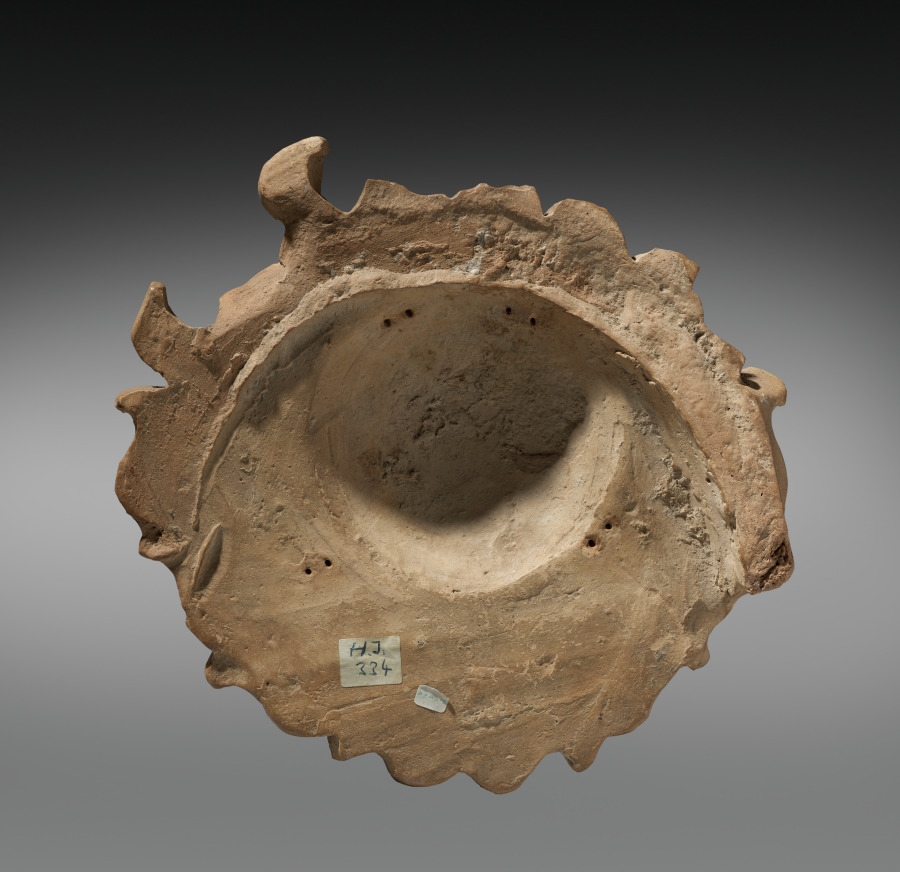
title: Gorgoneion Antefix (Ornamental Roof Tile)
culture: Greek / South Italian, Taranto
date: c. 500 BCE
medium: Terracotta (moldmade)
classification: Ceramic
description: This mold-made terracotta antefix, a type of ornamental roof tile, takes the form of a Gorgoneion, a disembodied Gorgon head. Nearly circular in shape, it features bulging, almond-shaped eyes and a grinning mouth with wide tongue and sharp teeth or tusks. S-shaped serpents surround the head, some standing tall. Traces of pigment suggest a more vivid original appearance, perhaps considered both terrifying and protective.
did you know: The Gorgoneion represents the decapitated head of Medusa, most famous of the three Gorgon sisters.